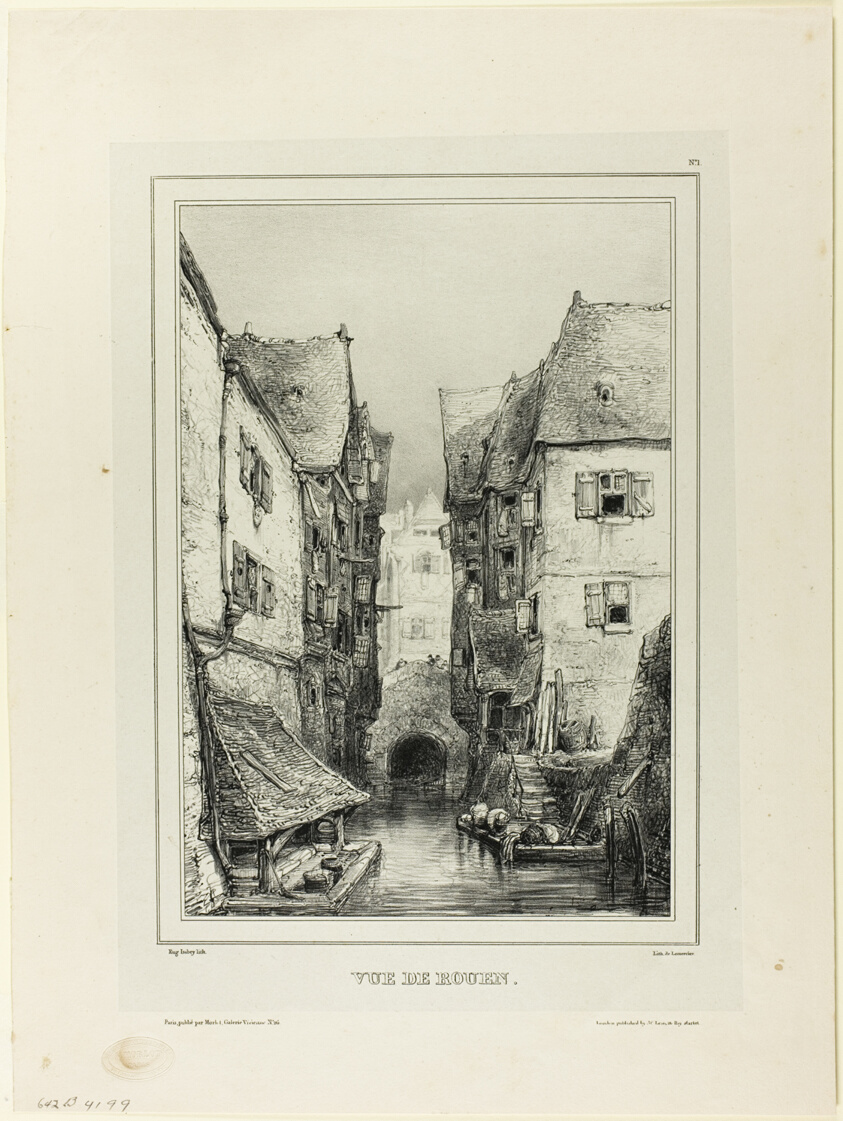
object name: Print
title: View of Rouen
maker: Eugène Isabey (French, 1803-1886); printed by Lemercier et Compagnie (French, 19th century)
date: 1832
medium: Lithograph in black on ivory China paper, laid down on cream wove paper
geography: France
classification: lithograph; print; prints and drawing